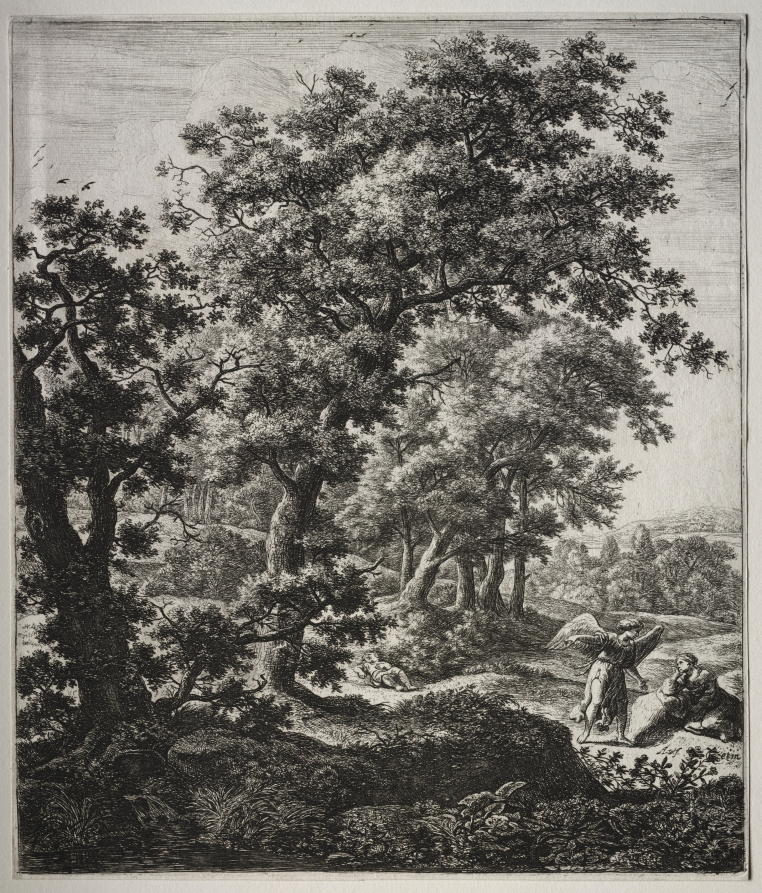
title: Six large upright landscapes with scenes from the Old Testament: Hagar comforted by the Angel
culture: Netherlands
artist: Anthonie Waterloo (Dutch, 1609/10–1690)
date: 1640–90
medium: etching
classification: Print